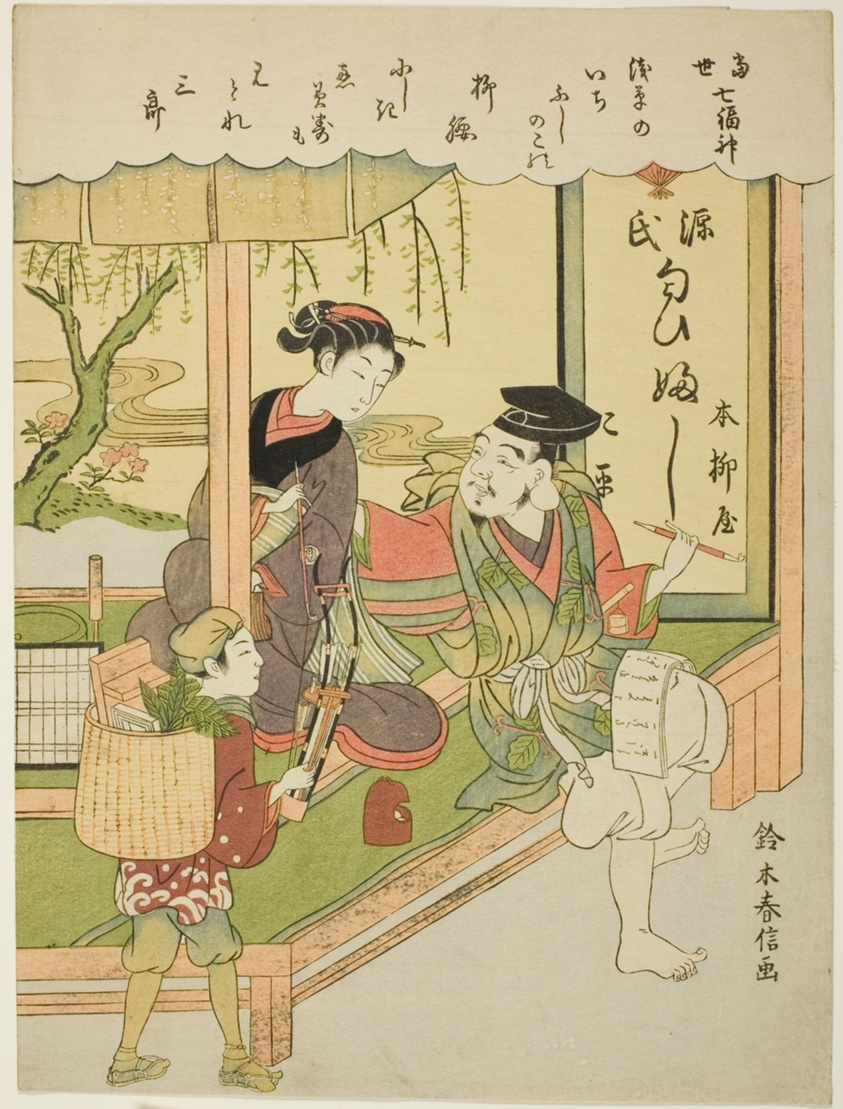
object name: Print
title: Ebisu, from the series "The Seven Gods of Good Luck in Modern Life (Tosei Shichi Fukujin)"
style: Japanese (culture or style)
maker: Suzuki Harunobu 鈴木 春信; Japanese, 1725 (?)-1770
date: c. 1769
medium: Color woodblock print; chuban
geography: Japan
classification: woodblock print; print; asian art